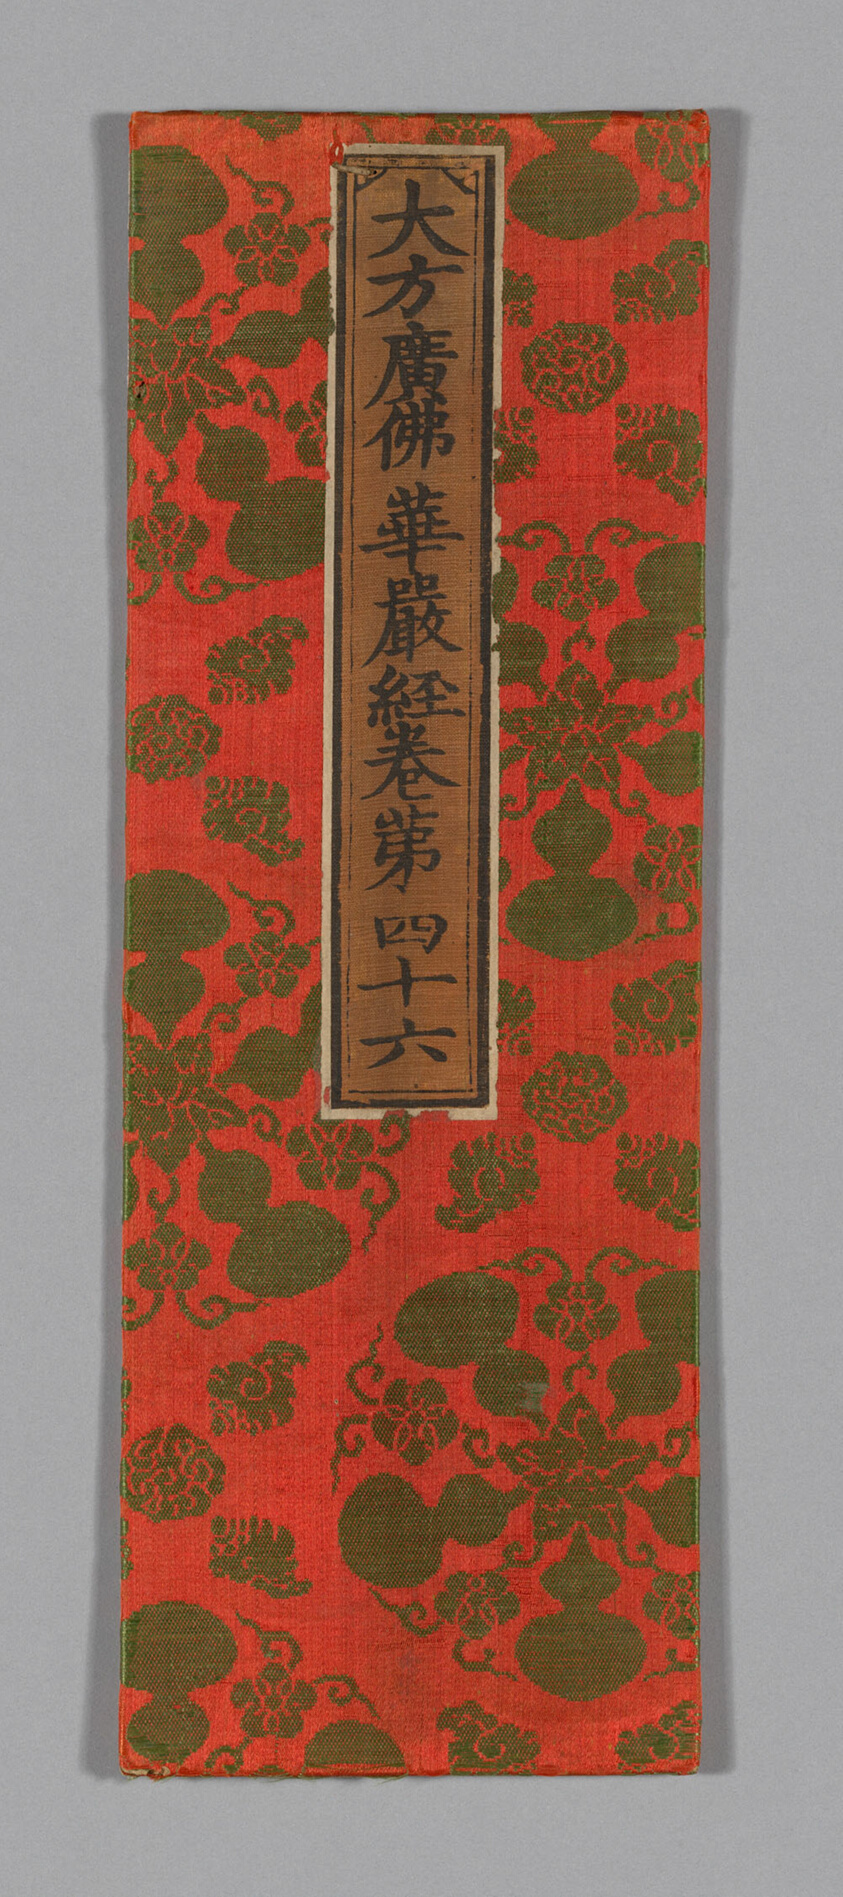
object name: Textile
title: Sutra Cover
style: ming, Chinese (culture or style), East Asian, asian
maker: China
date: Ming dynasty (1368–1644), c. 1590's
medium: Silk, warp-float faced 4:1 satin weave with supplementary patterning wefts bound in 1:4 weft-float faced satin interlacings; label: silk, plain weave; painted with ink; over board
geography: China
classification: textile; weaving